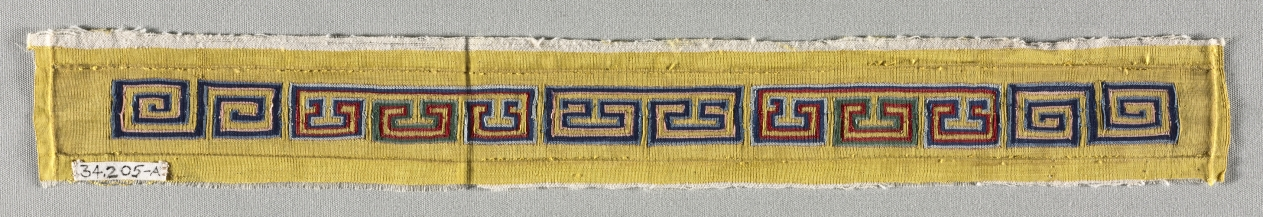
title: Cushion Cover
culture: China, Qing dynasty (1644-1911)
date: 1700s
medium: silk, metallic thread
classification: Textile